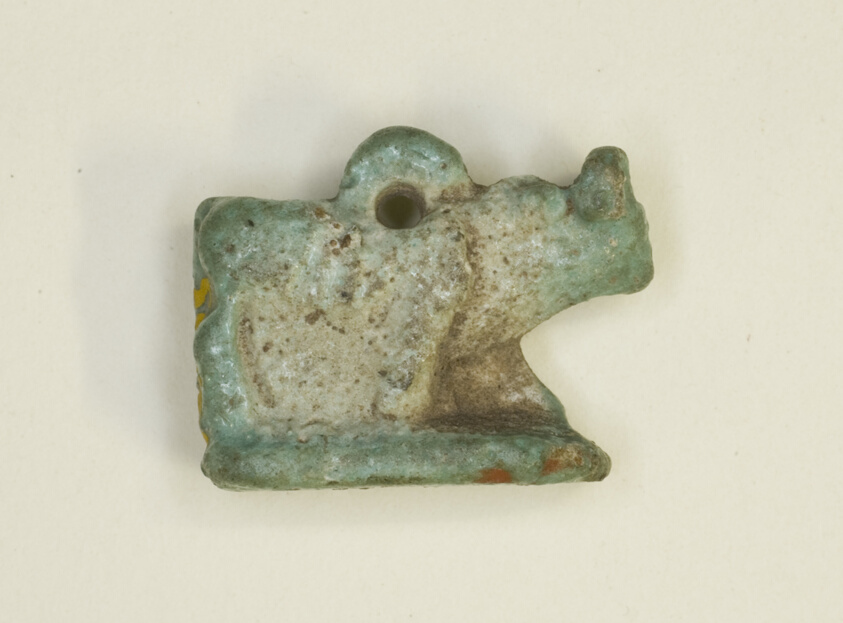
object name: Costume and Accessories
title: Amulet of a Hathor Cow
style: third intermediate period, egyptian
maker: Egyptian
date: Third Intermediate Period, Dynasty 21–25 (1070–656 BCE)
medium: Faience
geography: Egypt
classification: amulet; jewelry; ceramics; ancient art; costume; faïence (composite material)